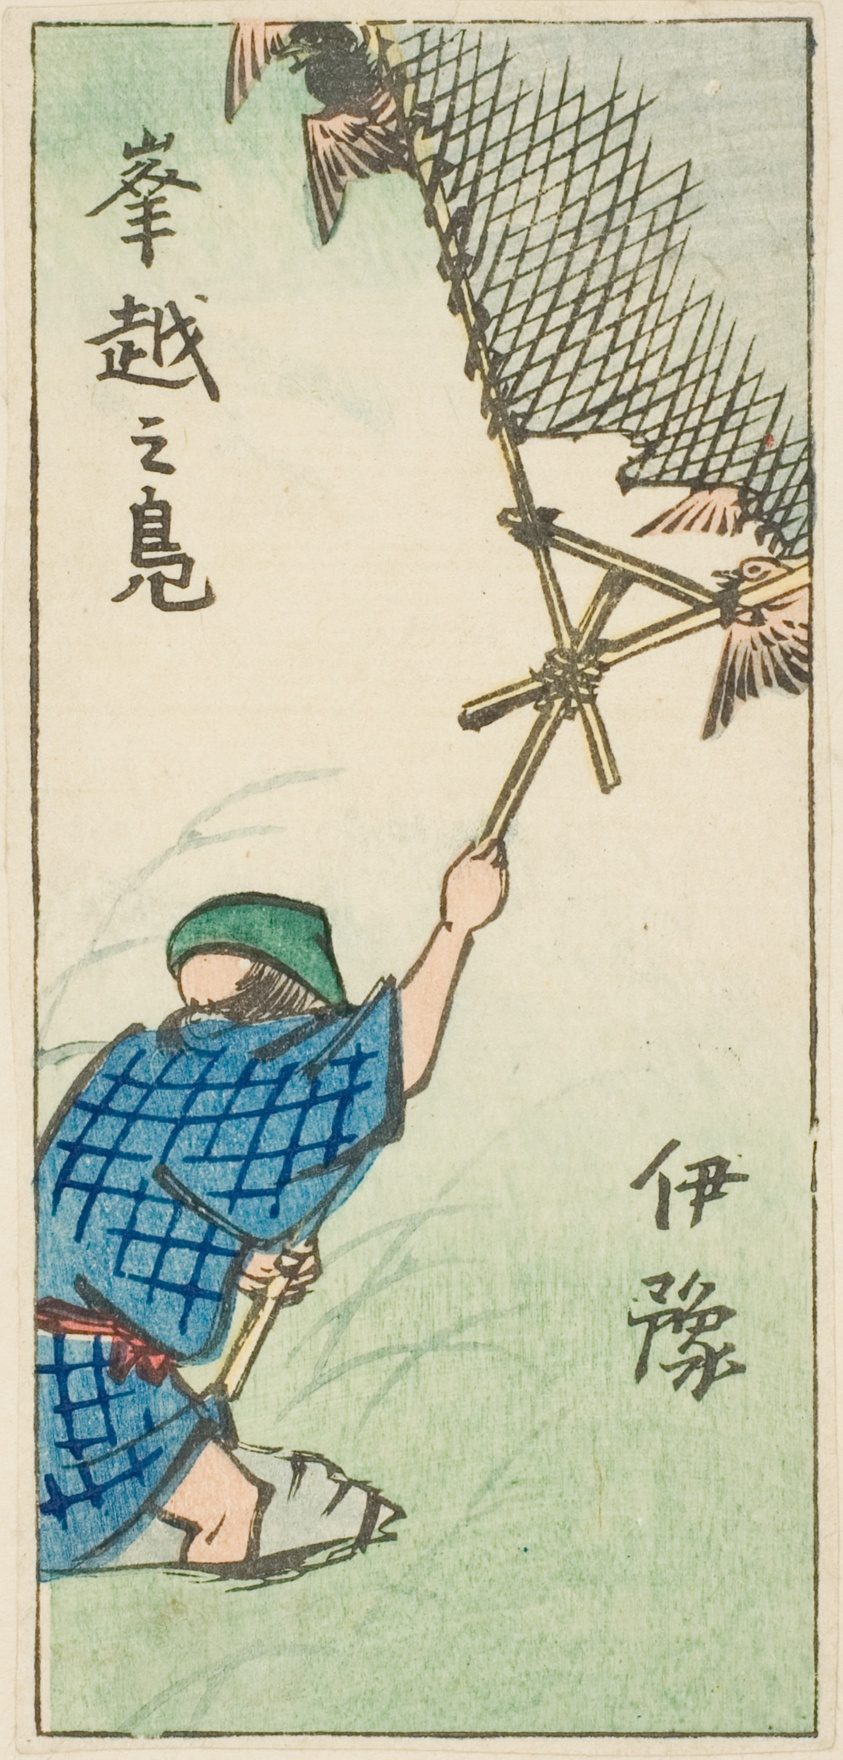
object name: Print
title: Catching Wild Ducks in Iyo Province (Iyo, okoshi no kamo), section of sheet no. 16 from the series "Cutout Pictures of the Provinces (Kunizukushi harimaze zue)"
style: Japanese (culture or style)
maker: Utagawa Hiroshige 歌川 広重; Japanese, 1797-1858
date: 1852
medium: Color woodblock print; section of harimaze sheet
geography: Japan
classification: woodblock print; print; asian art